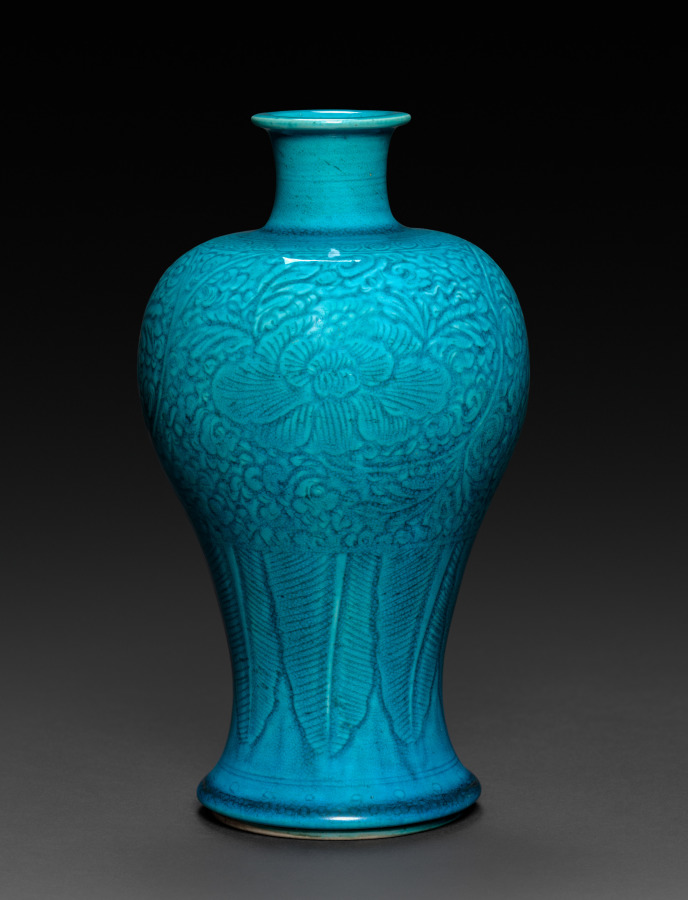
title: Vase with peacock blue glaze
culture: China, Qing dynasty (1644-1911), Kangxi reign (1661-1722)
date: 1662–1722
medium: porcelain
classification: Ceramic